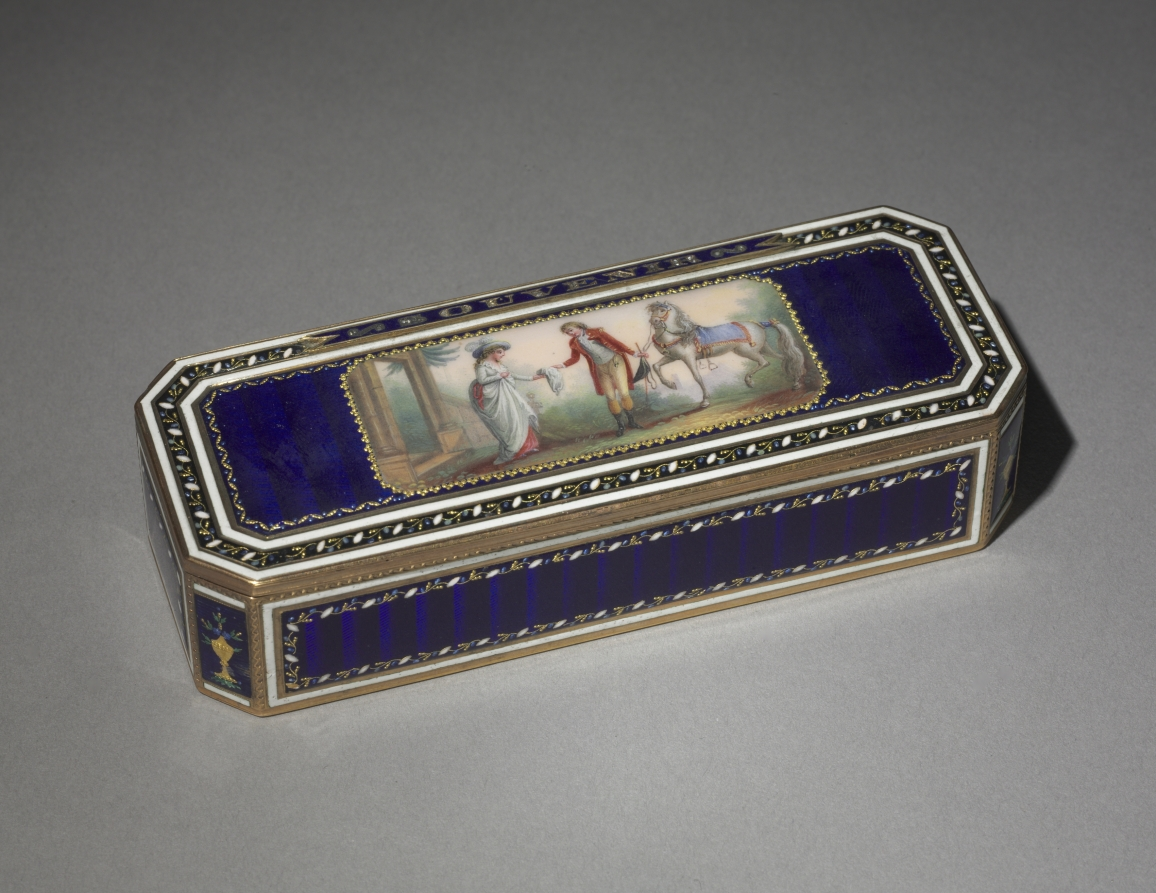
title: Box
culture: Switzerland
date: early 1800s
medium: gold and enamel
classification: Enamel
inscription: at top, tag of blue enamel inscribed with "SOUVENIR."